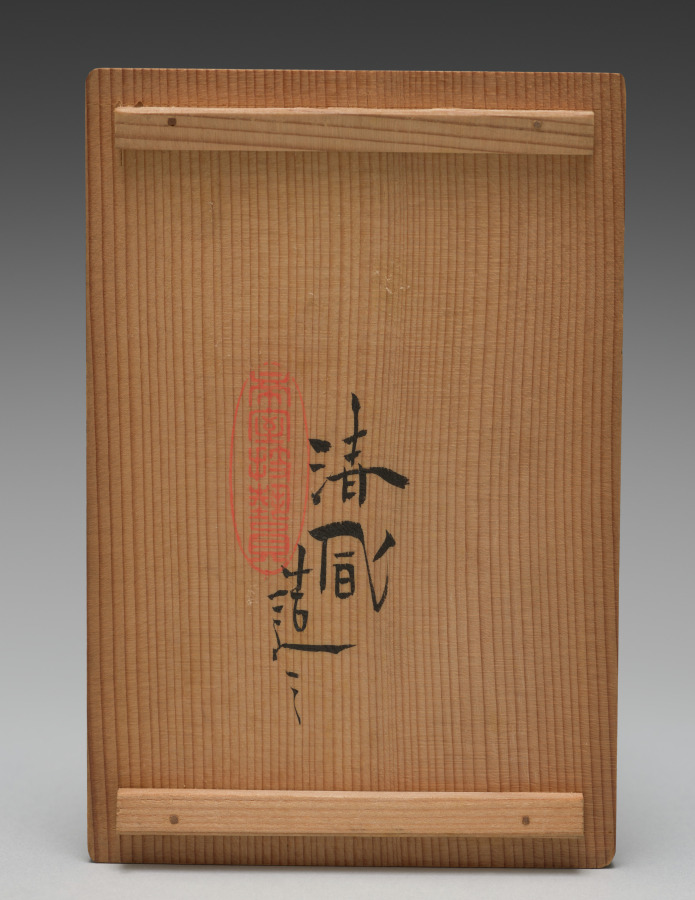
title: Water Cooler with Pines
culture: Japan, Meiji period (1868–1912)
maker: Seifū Yohei III (Japanese, 1851–1914)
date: 1893–1914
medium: Porcelain with underglaze blue and molded designs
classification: Ceramic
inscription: The center of the base contains an ovoid “Seifu” seal.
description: Hot water coolers, or yuzamashi, are essential components of sencha tea sets. Yuzamashi are used to cool boiled water to the ideal temperature for the type of tea to be brewed. The kidney-like shape of this one permits it to be cradled in one hand, following curvature of the palm, with the tips of the thumb and index finger each pressed against a nyoi staff-head-shaped applied form, perfectly placed to ensure a stable hold. Someone pinching the cooler in this way would have enough protection from the heat to maintain a steady grip but also sufficient contact along the base of thumb to assess the water temperature. On each of the cooler’s two longer sides, a pine tree in grass or sand is painted under the glaze in cobalt blue. The tree on one side has two main roots and two large branches, while that on the other has a single, thick, curved line from root to tip with racks of needles spreading across the width of the sky. A blue oval is traced along the footring, and the center of the base contains an ovoid “Seifu” seal.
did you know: Evergreen, pines have associations with eternal youth and longevity.